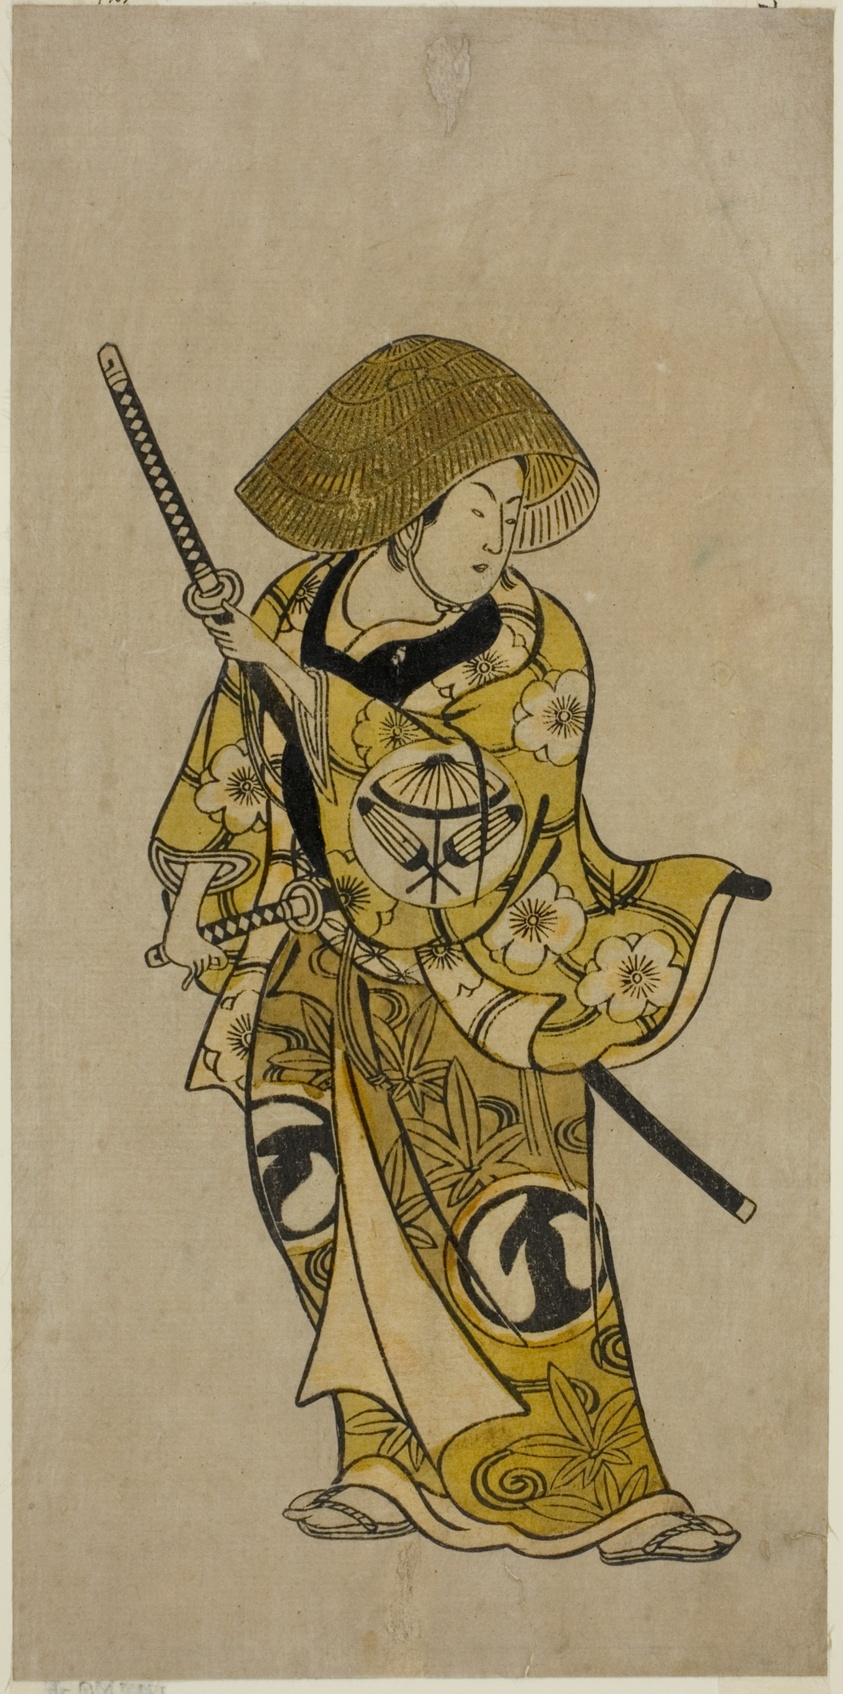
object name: Print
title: The Actor Sawamura Kamesaburo as Nagoya Kosanza in the play "Keisei Fukubiki Nagoya," performed at the Nakamura Theater in the first month, 1731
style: Japanese (culture or style)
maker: Attributed to Okumura Toshinobu; Japanese, active c. 1717-50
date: 1731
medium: Hand-colored woodblock print; hosoban, urushi-e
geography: Japan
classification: woodcut; painting; asian art; print